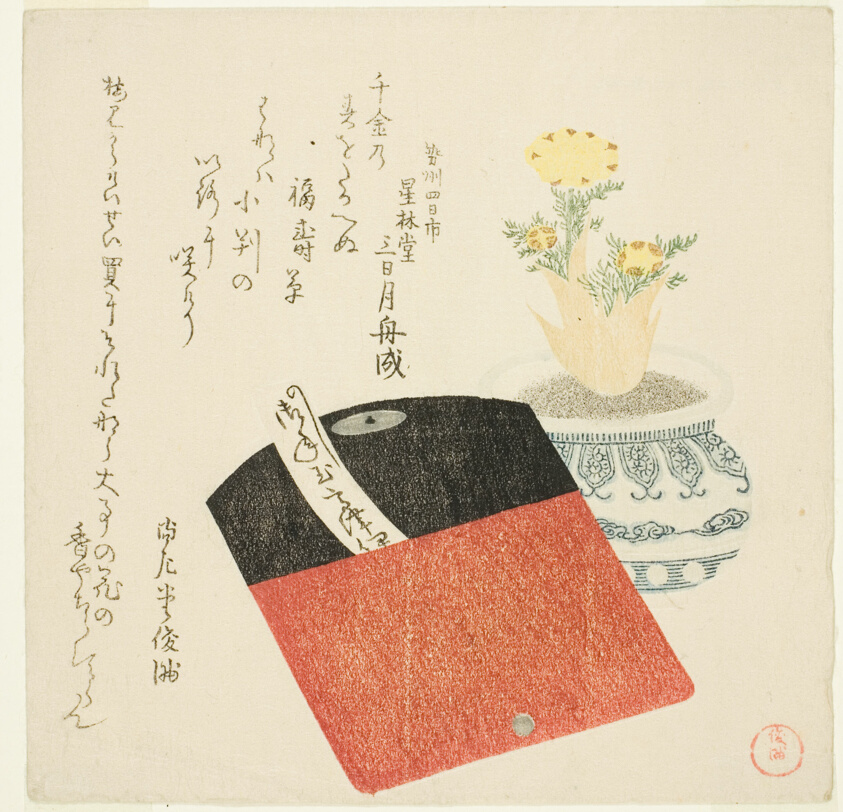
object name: Print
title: Coin Pouch and Potted Adonis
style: Japanese (culture or style)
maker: Kubo Shunman (Japanese, 1757–1820)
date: c. 1802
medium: Color woodblock print; shikishiban, surimono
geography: Japan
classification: woodblock print; print; asian art